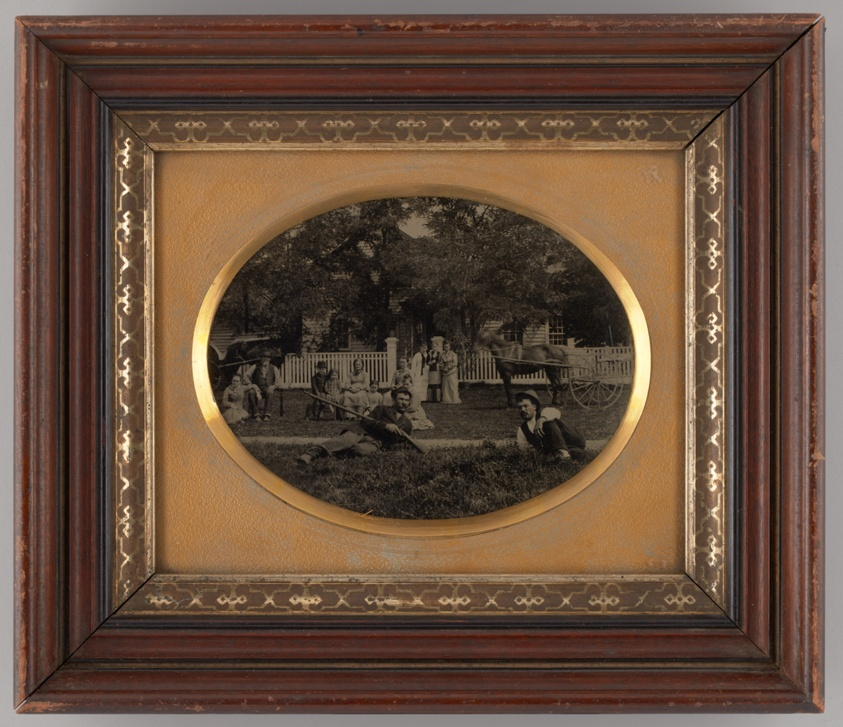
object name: Photograph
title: Untitled (Group Portrait of People in a Park)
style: 19th century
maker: Unknown maker; American, 19th century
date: 1870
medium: Tintype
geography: United States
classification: portrait; photography; photograph; photographic process; tintype; portrait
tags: lundberg collection, people, parks, leisure